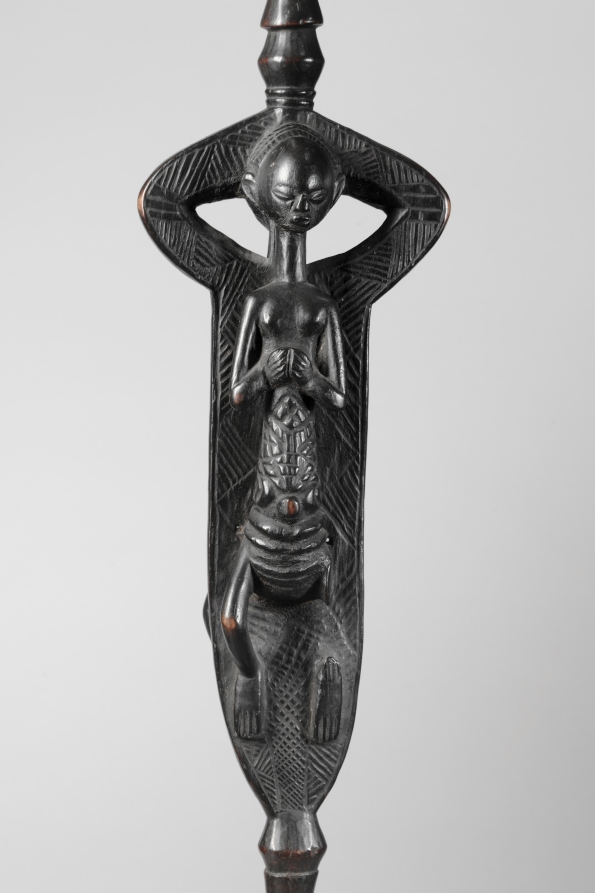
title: Staff of Office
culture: Central Africa, Democratic Republic of the Congo, Luba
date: early to mid-1800s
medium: Wood and iron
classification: Sculpture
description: Sanctified by a ritual specialist and enhanced with medicinal substances, the staff possessed supernatural qualities and was endowed with healing power. Luba staffs are among the most important regalia of Luba kings. The metal point alludes to the kingdom's stability and durability. Each staff has its own distinctive iconography to reflect regional styles. As Chief Msidi (former owner of this staff) ruled over the Yeke kingdom (and not the Luba kingdom), it begs the question of how he acquired this symbol of another realm's power.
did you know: The Yeke kingdom ruler Chief Msidi gave this as a gift of appreciation to the British missionary Frederick Stanley Arnot, whom the chief had invited to his kingdom.